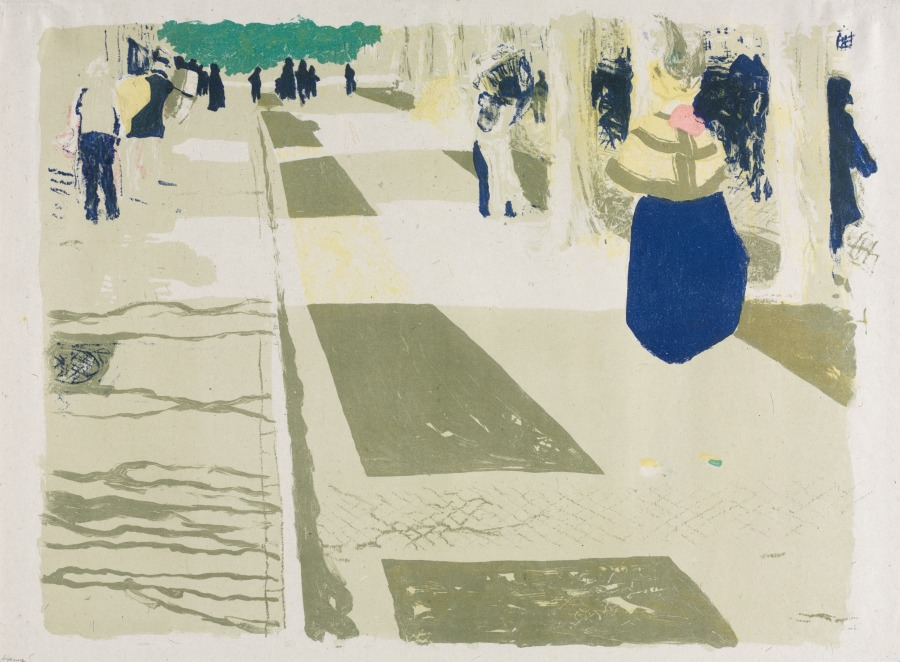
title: Landscapes and Interiors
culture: France, 19th century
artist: Édouard Vuillard (French, 1868–1940)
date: 1899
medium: lithograph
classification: Print